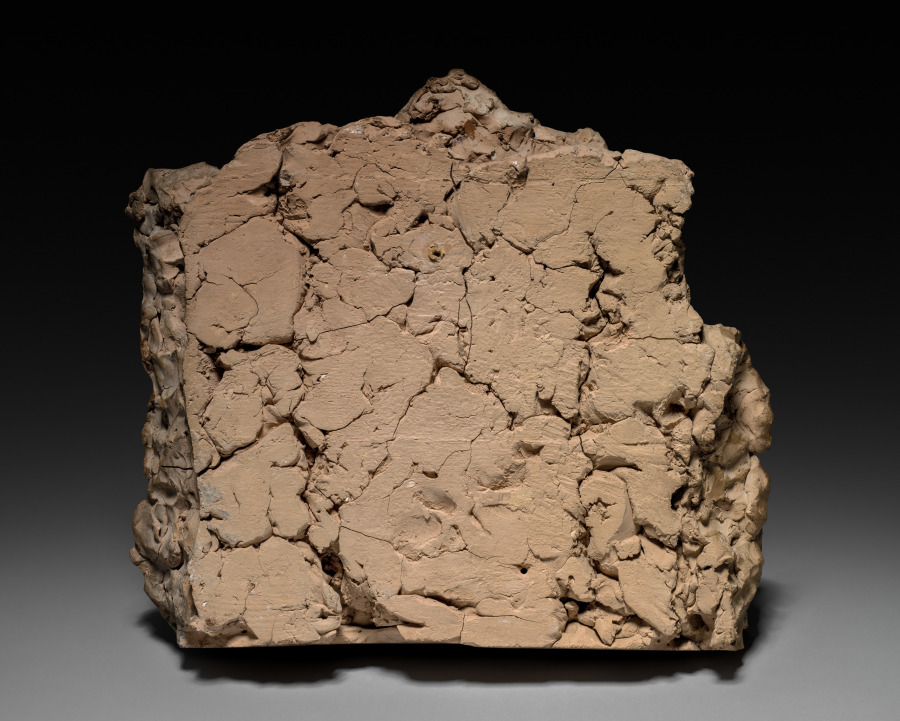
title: Two Angels and Cherubs Bearing an Icon of Christ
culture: Italy, Rome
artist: probably by Paolo Naldini (Italian, 1616–1691)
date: c. 1670–80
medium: terracotta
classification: Sculpture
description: This work is probably a study for a large altarpiece that would have combined several materials, including marble, stucco, and paint. The artist modeled his design in soft clay, which was then hardened by firing; subtle tints suggest the richness of the finished work. The idea of using sculptural figures to support a painted image within an altarpiece was influenced by the work of the Roman sculptor Gian Lorenzo Bernini (1598–1680), with whom Naldini is known to have worked.